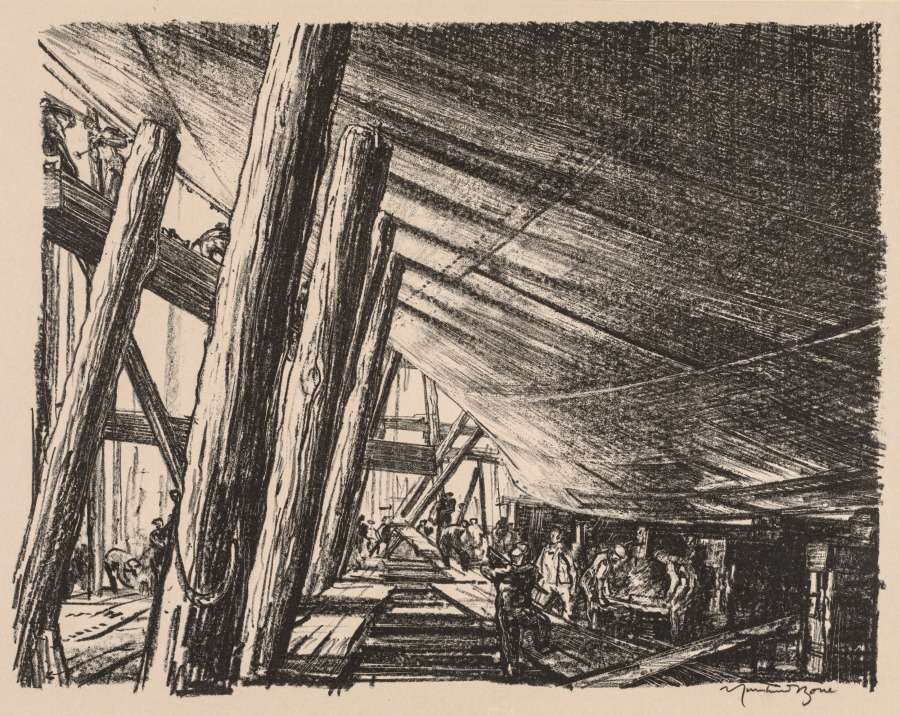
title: On the Clyde, 1917-1918: Building a Cross Channel Train Ferry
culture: England, 20th century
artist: Muirhead Bone (British, 1876–1953)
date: 1917–1918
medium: lithograph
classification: Print